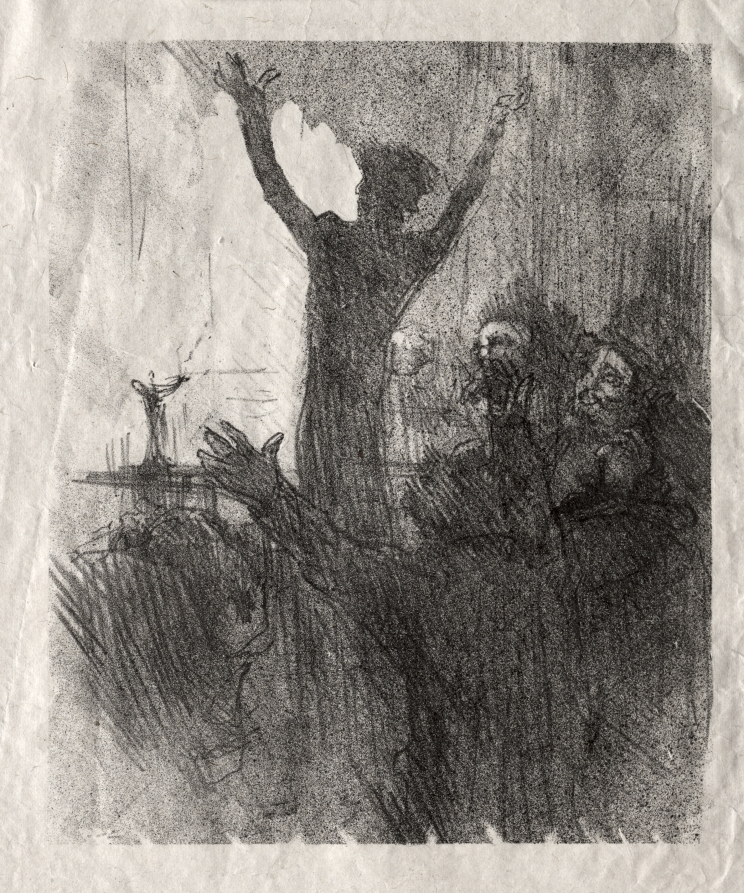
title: Schlomé Fuss à la Synagogue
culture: France, 19th century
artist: Henri de Toulouse-Lautrec (French, 1864–1901)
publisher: Henri Floury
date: 1897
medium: lithograph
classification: Print